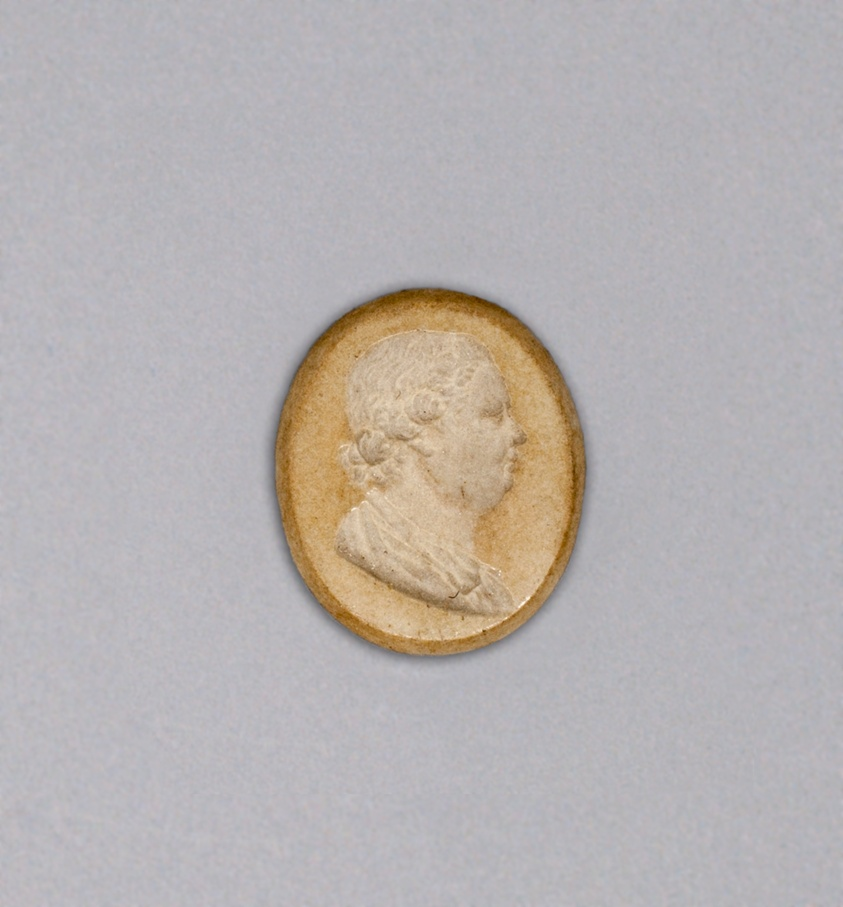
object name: Ceramics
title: Intaglio with Head of a Man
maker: Wedgwood Manufactory (England, founded 1759)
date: Late 18th century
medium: Stoneware (jasperware)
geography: Burslem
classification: sculpture; stoneware; european decorative arts; ceramics